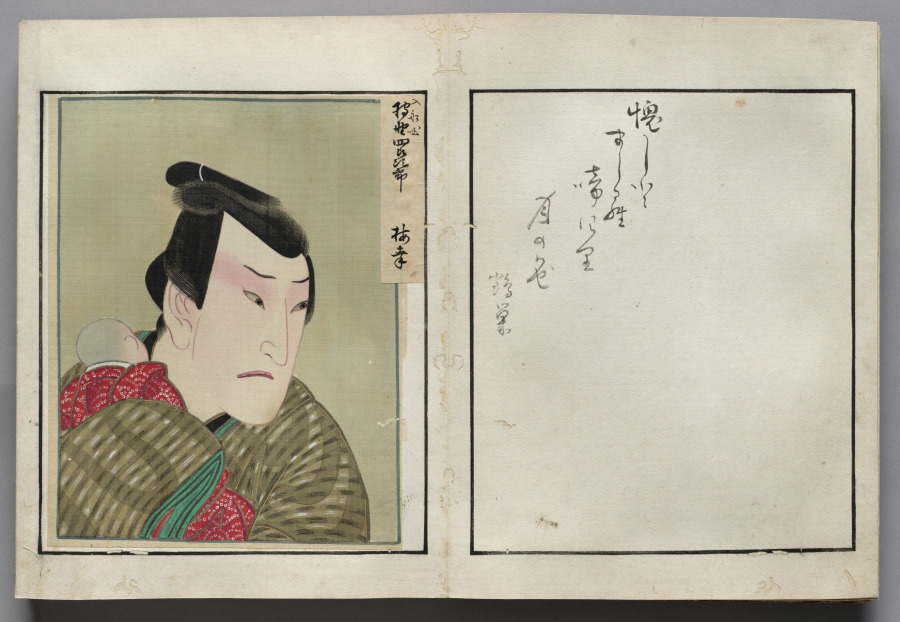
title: Double-Leaf from Album of Actor Portraits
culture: Japan, Edo period (1615–1868)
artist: Shōrakusai (Japanese)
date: c. 1790–1810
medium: double-leaf from an accordion-style album; ink on paper (right) and ink and color on silk (left)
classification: Bound Volume